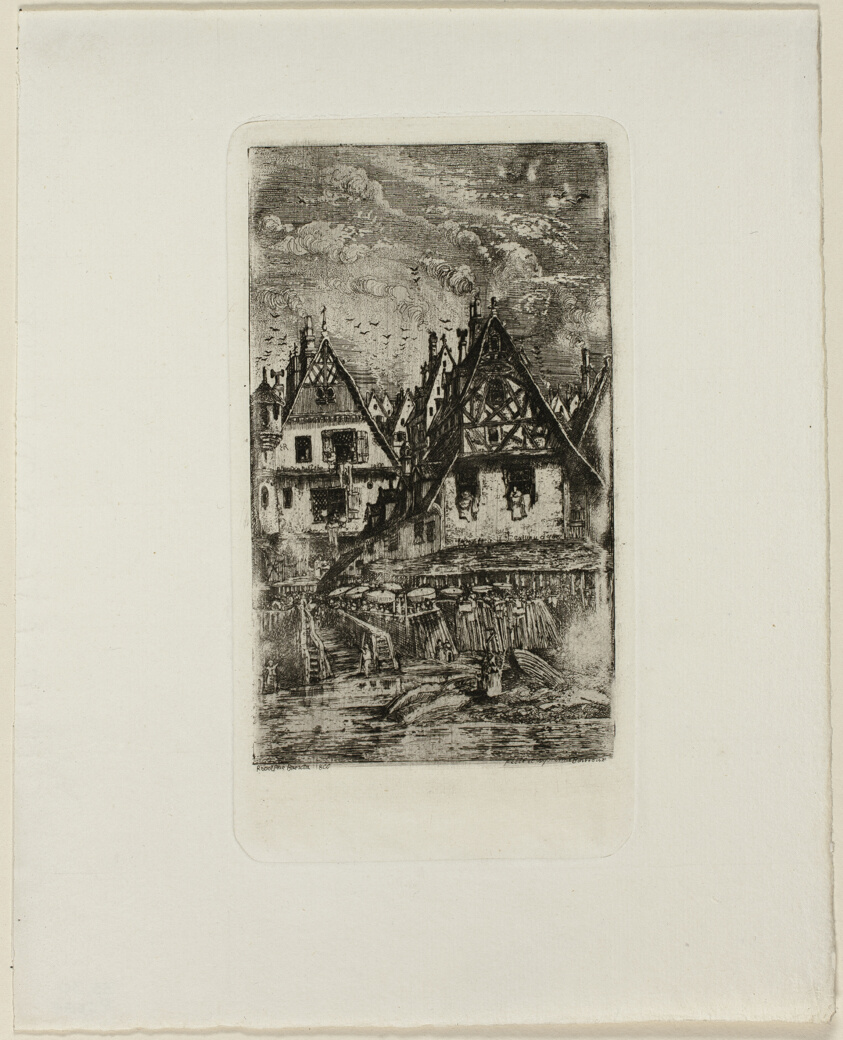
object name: Print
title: Marketplace with Sunshades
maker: Rodolphe Bresdin (French, 1825-1885)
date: 1866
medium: Etching on white laid paper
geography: France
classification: etching; print; prints and drawing